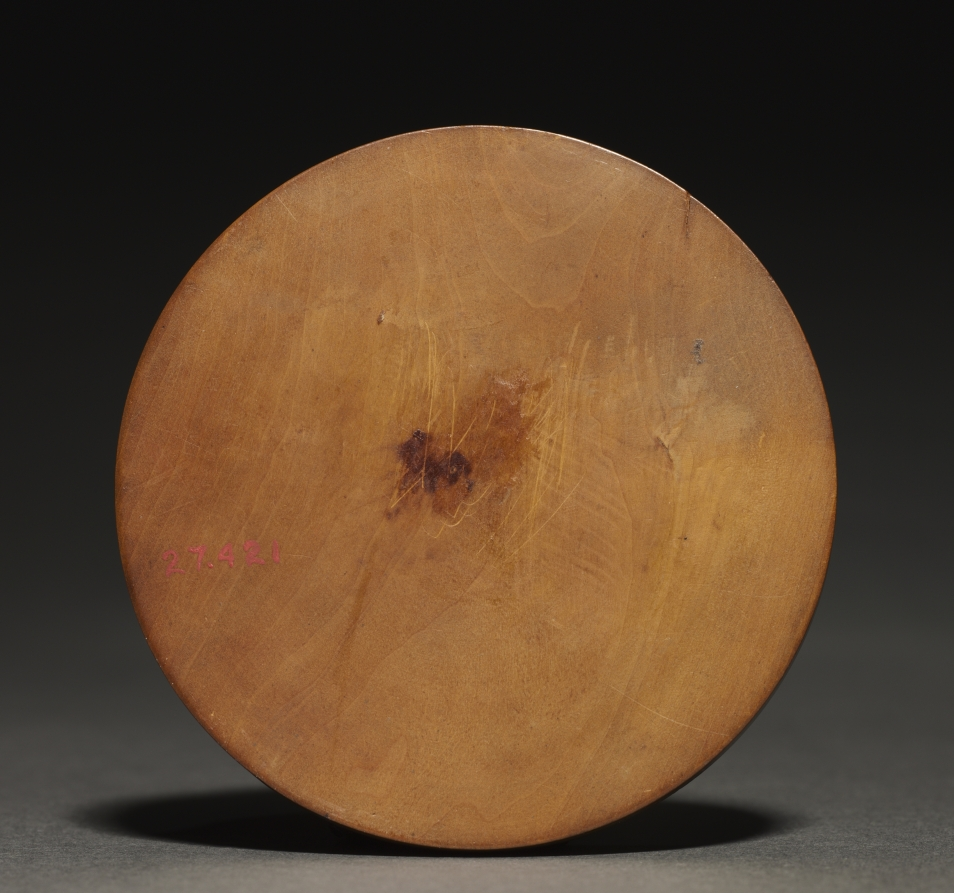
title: Portrait of a Man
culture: Germany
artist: Friedrich Hagenauer (German, 1490/1500–after 1546)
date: 1527–1546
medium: boxwood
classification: Sculpture